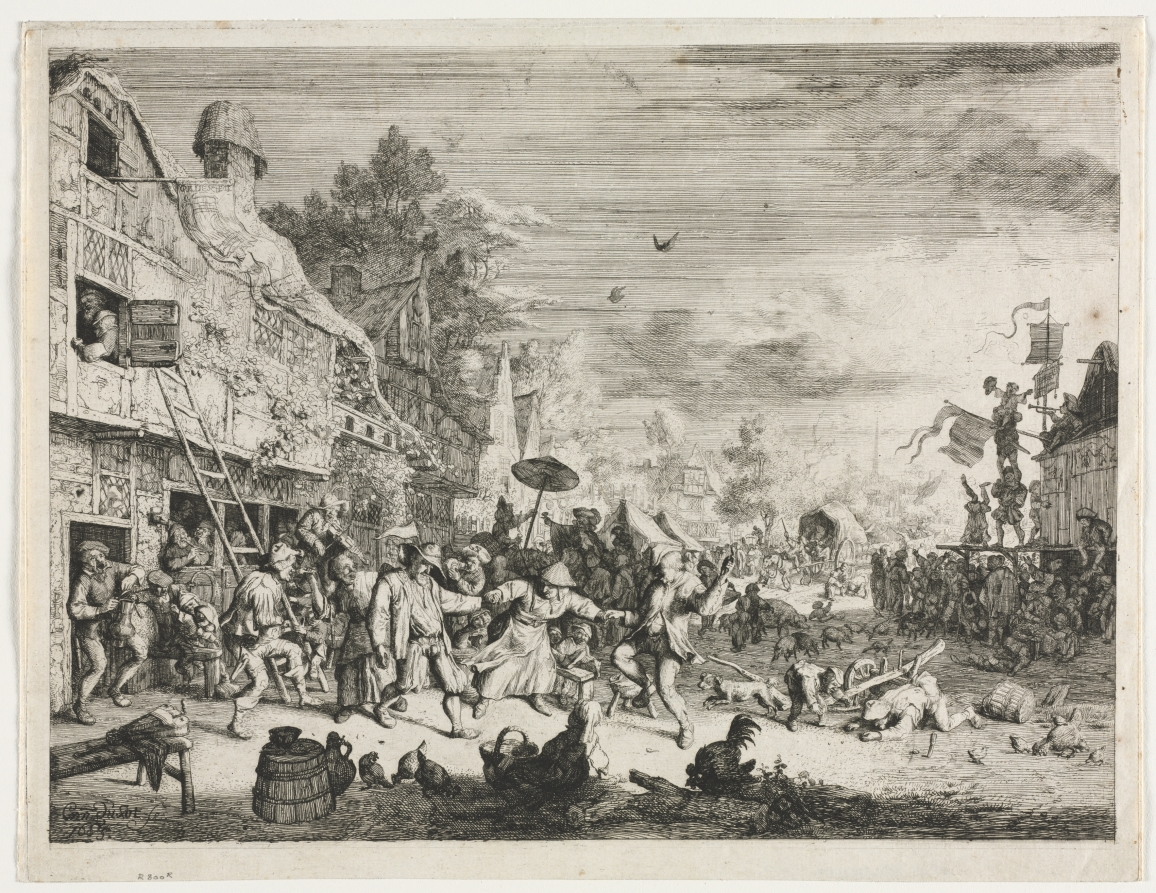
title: Village Fair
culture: Netherlands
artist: Cornelis Dusart (Dutch, 1660–1704)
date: 1685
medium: etching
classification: Print